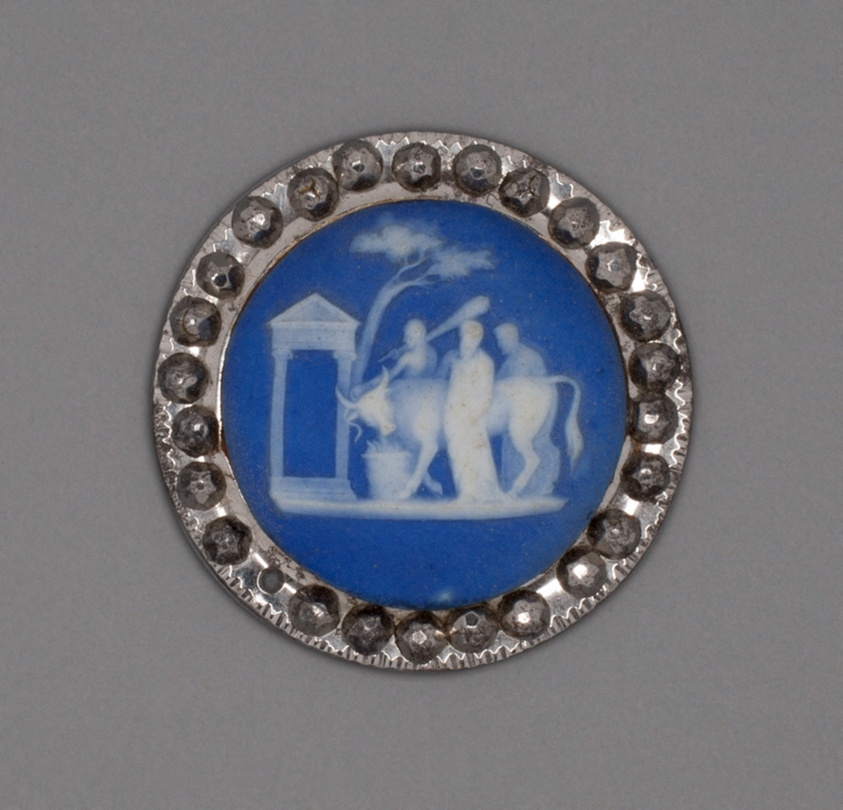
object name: Ceramics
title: Button with Sacrifice of a Bull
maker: Wedgwood Manufactory (England, founded 1759)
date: Late 18th century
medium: Stoneware (jasperware)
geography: Burslem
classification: accessories (object genre); stoneware; european decorative arts; ceramics